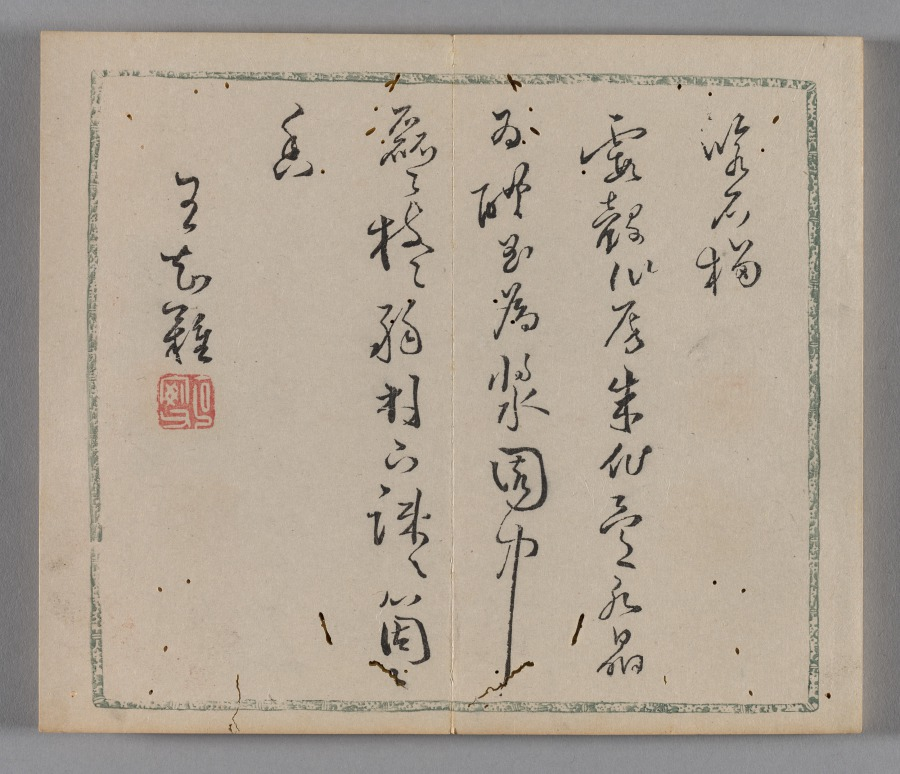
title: Ten Bamboo Studio Collection of Calligraphy and Painting: Round Fans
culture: China, Qing dynasty (1644-1911)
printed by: Hu Zhengyan (Chinese, c. 1584–1674)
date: 1633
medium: Woodblock-printed book; ink and colors on paper; first edition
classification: Print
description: Color printing reached a level of perfection in the early 1600s, as seen in this Ten Bamboo Studio Collection of Calligraphy and Painting and the Mustard Seed Garden Manual of Painting (printed 1679 and 1701). The painterly quality, precision in registering (aligning) the woodblocks, and harmonious colors made them the most successful color print editions in Chinese history. Both editions were printed and compiled in Nanjing, spread nationwide, and had a great impact on the arts in Japan and Korea.